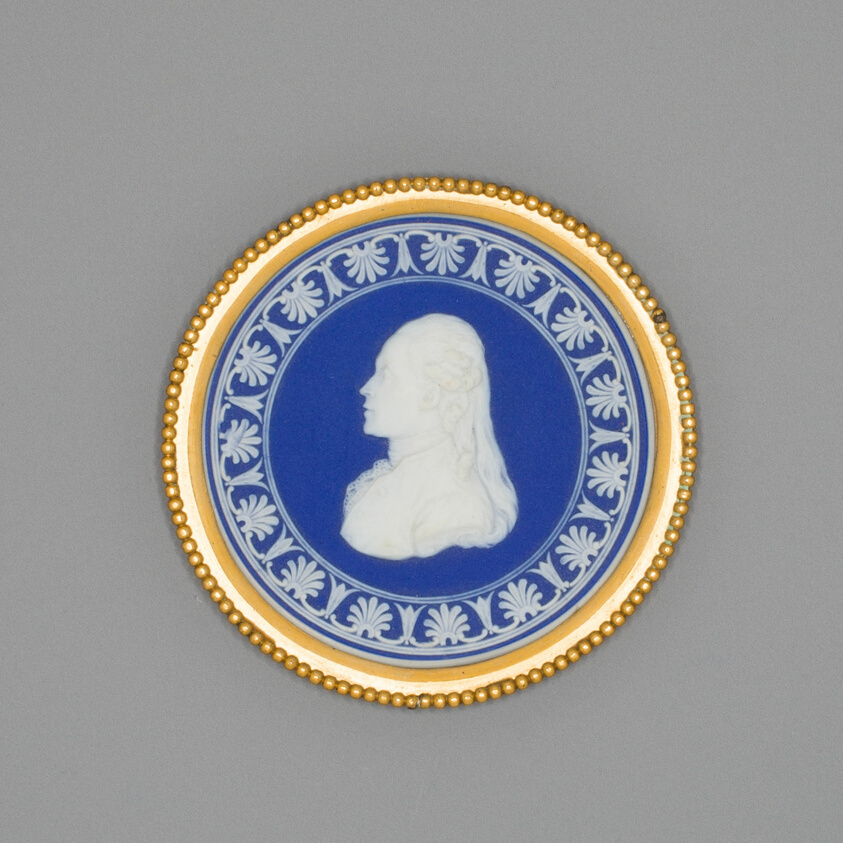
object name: Ceramics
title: Medallion with Portrait of Charles Maurice de Talleyrand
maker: Wedgwood Manufactory (England, founded 1759)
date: Late 18th century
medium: Stoneware (jasperware)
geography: Burslem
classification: sculpture; stoneware; european decorative arts; ceramics